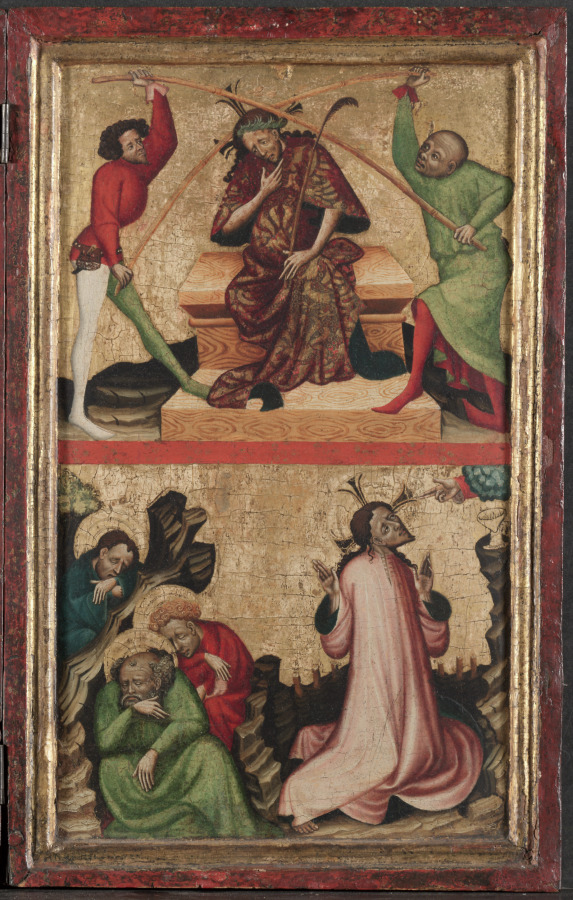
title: Diptych with the Passion of Christ (right wing): Crowning with Thorns and Agony on the Garden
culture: Austria, Styria, 15th century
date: c. 1400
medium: tempera and gold on wood (oak)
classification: Painting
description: This diptych, or two-panel painting, is hinged at the center so that it could be opened and closed and easily transported. It was clearly designed as an object for private devotion. The owner would have been able to contemplate the Passion of Christ and pray before these scenes. The top two images depict Christ’s scourging at the pillar and the crowning of thorns, while the lower two show Jesus before Pontius Pilate and in the Garden of Gethsemane. The scenes would have been read clockwise beginning with the lower right. On the back of these panels are remnants of paintings that have since been scraped off.